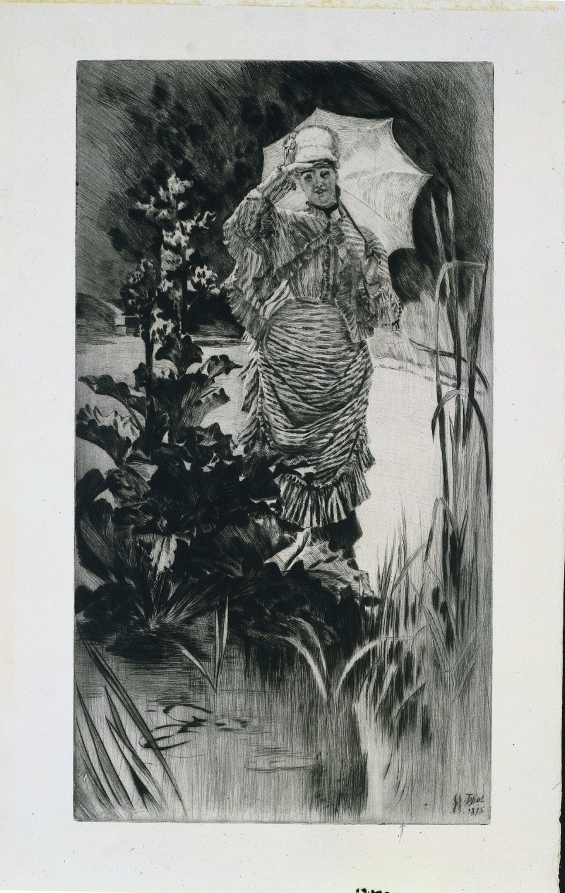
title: Spring Morning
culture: France, 19th century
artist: James Tissot (French, 1836–1902)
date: 1875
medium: drypoint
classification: Print